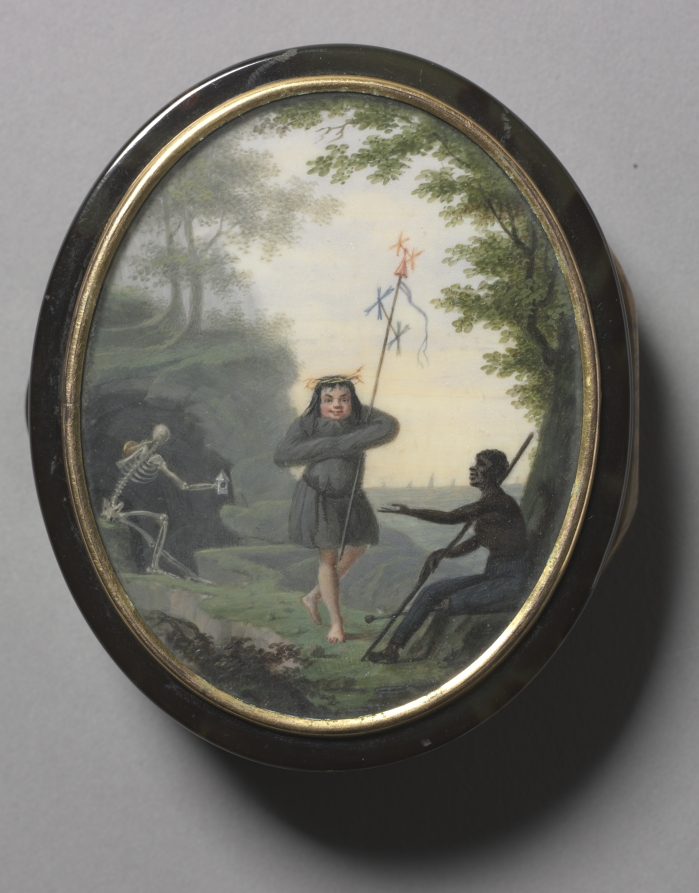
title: Snuff Box with Figures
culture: Continental, (France), late 18th century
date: late 18th century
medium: watercolor on ivory, wood and tortoiseshell with painted miniatues under glass and gilt metal mounts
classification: Miscellaneous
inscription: inscribed on funerary urn: "ci GIT" and below a scull and crossbones.